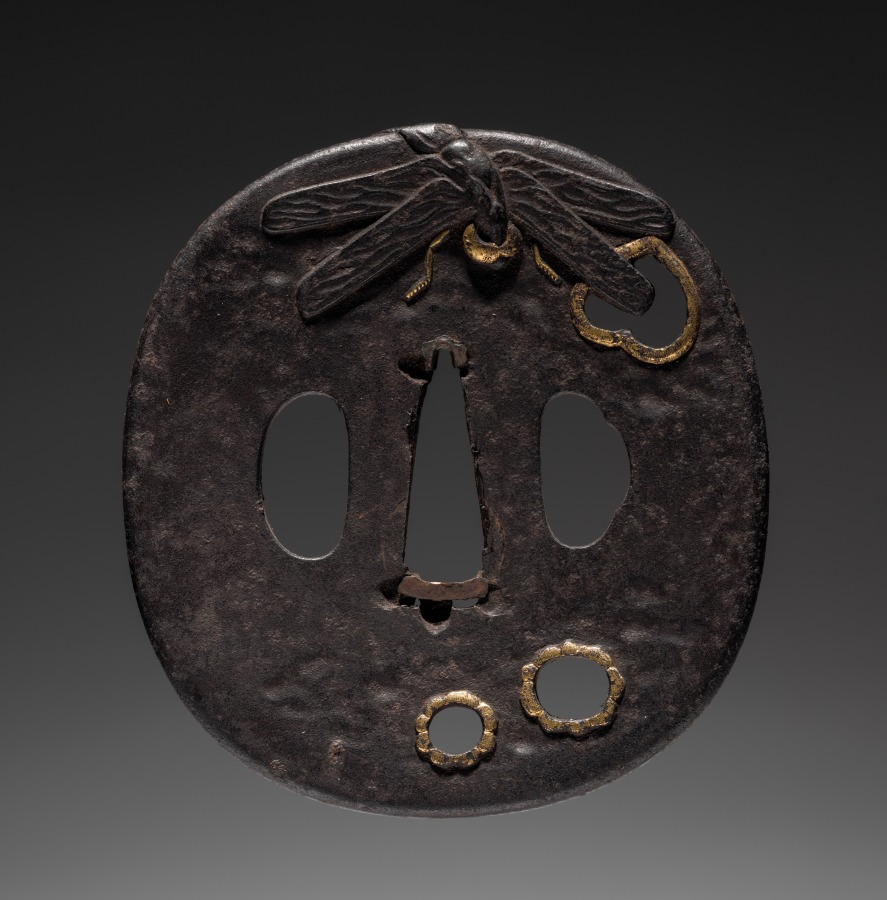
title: Sword Guard (Tsuba) with Dragonfly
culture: Japan, possibly Edo period (1615–1868)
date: c. 1615–1868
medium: metal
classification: Arms and Armor